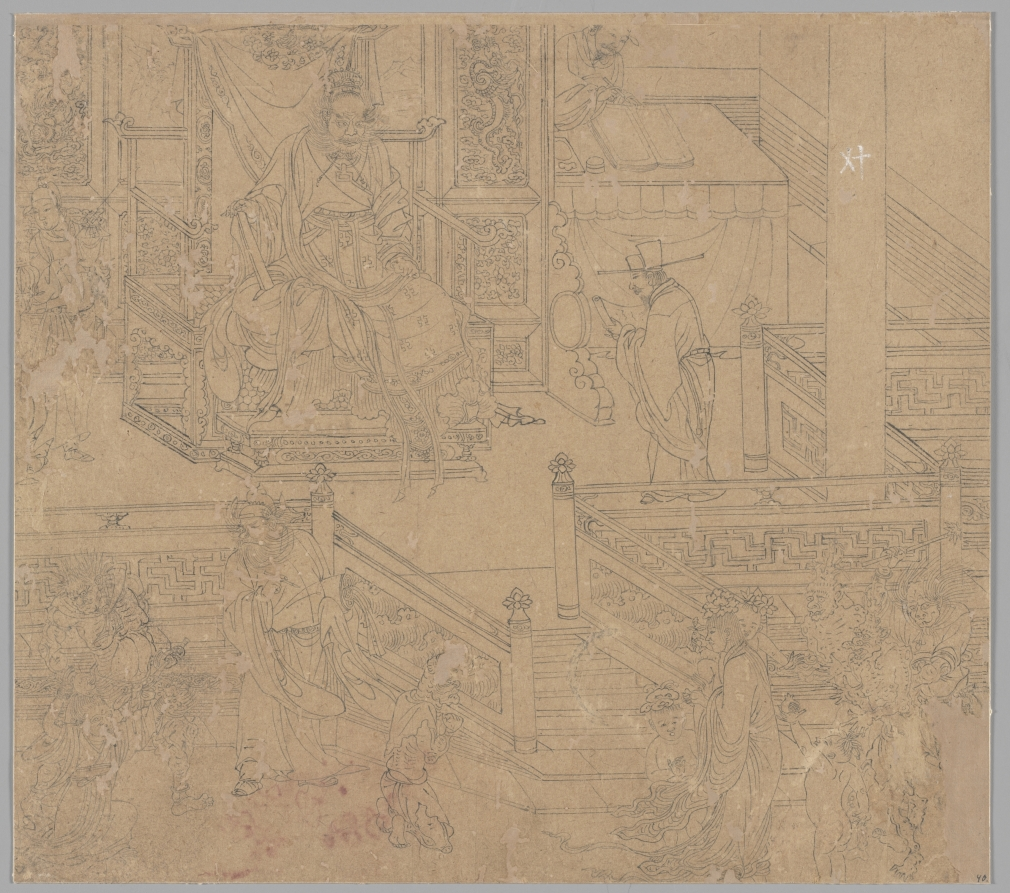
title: Album of Daoist and Buddhist Themes: Kings of Hells: Leaf 40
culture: China, Southern Song dynasty (1127-1279)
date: 1200s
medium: Album, ink on paper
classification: Painting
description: This extraordinary album has 50 paintings on a variety of religious subjects. They were likely created by several master craftsmen to share with studio apprentices as models for fulfilling commissions. The Jade Emperor and the Daoist pantheon make up the first 26 leaves. The next 14 leaves portray the Buddhist Ten Kings of Hell administering punishments to the dead. The third section, called “Clearing the Mountains,” features divine soldiers, led presumably by the deity Erlang Shen 二郎神, fighting undesirable creatures.